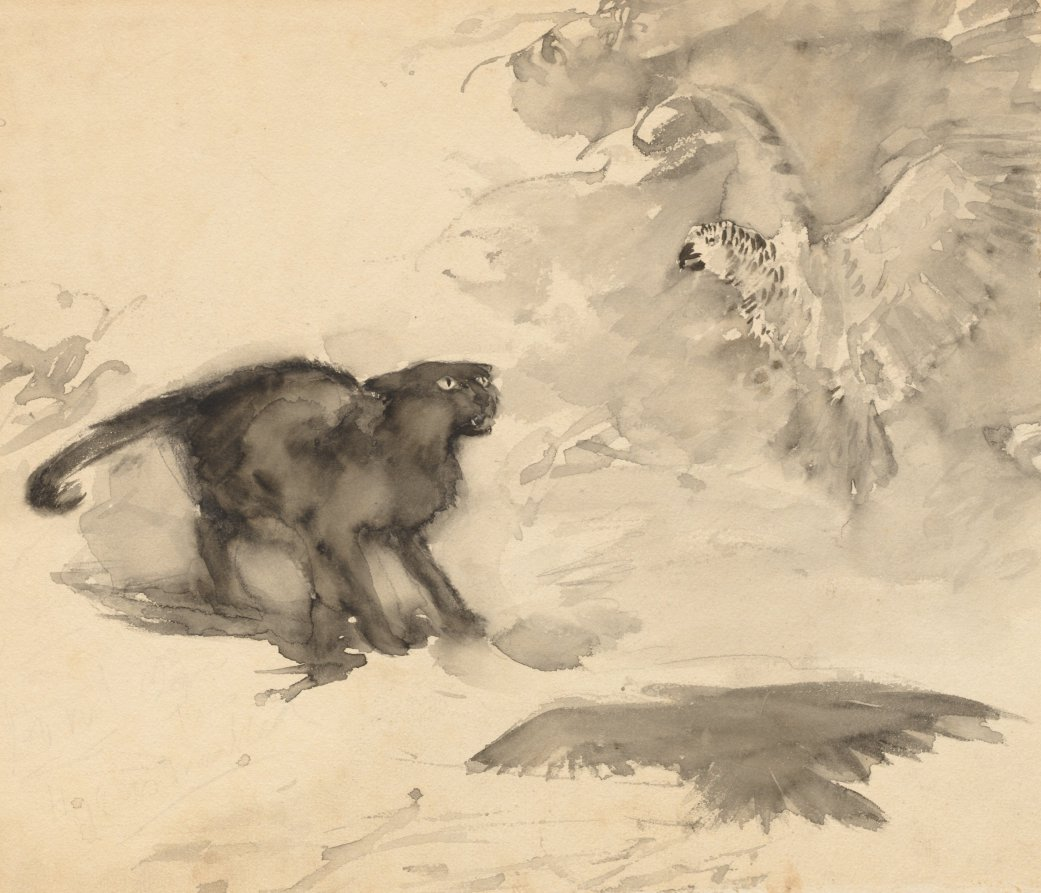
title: The Parrot and the Cat (Sketch for "Good-Night" by Eleanor Gates)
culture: England, late 19th-early 20th century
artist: Arthur Rackham (British, 1867–1939)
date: c. 1905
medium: black ink wash with graphite on paper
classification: Drawing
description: Arthur Rackham was one of the most successful book illustrators of the early 20th century. He is best known for his colored illustrations for luxury editions intended as Christmas gifts. However, Rackham also did some work as a commercial illustrator. He designed ephemera like bookplates and greeting cards, and created illustrations for several magazines. The image associated with this sketch is an example of the later. It was one of six published in the February 1906 issue of Scribner's Magazine accompanying the short story "Buenas Noches" by Eleanor Gates. This sketch shows the tale's two subjects in the same positions and poses as in the finished composition.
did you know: This sketch shows the climax of the story when Loretta the Parrot confronts her enemy, Tomasso the cat, to protect her friend, Tony the canary.